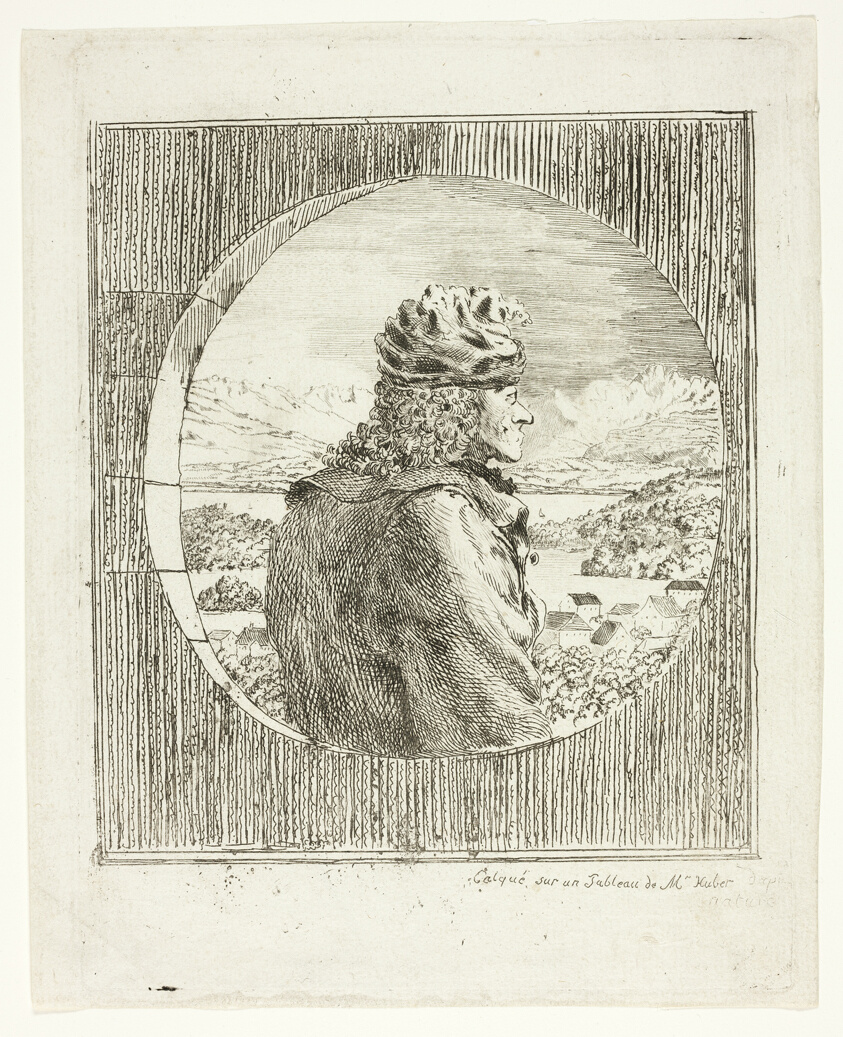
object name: Print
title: Voltaire Seen in Profile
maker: Jean Huber (Swiss, 1721-1786)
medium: Etching on ivory laid paper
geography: Switzerland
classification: etching; print; prints and drawing